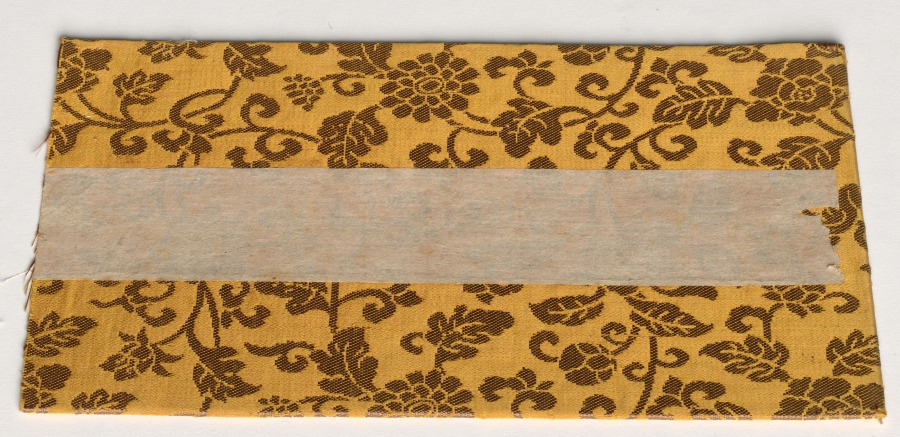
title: Textile Book Cover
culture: Japan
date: 1800s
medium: silk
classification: Textile